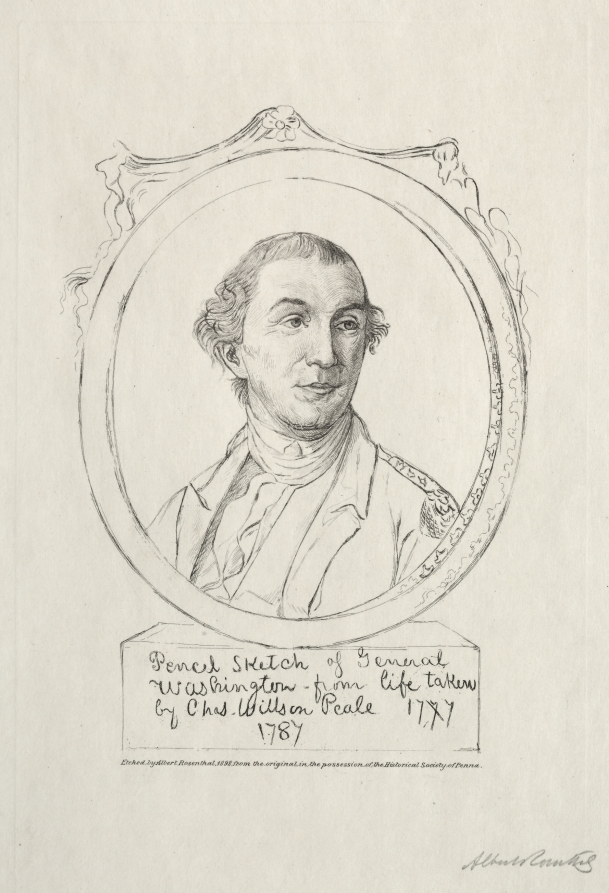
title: George Washington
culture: America, late 19th Century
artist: Albert Rosenthal (American, 1863–1939)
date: 1898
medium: etching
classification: Print